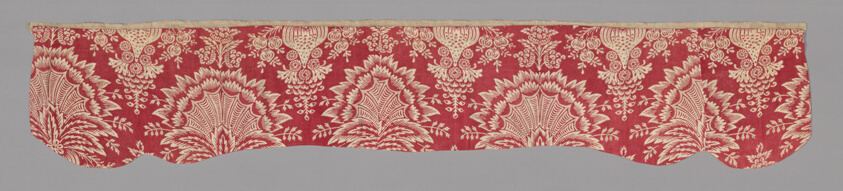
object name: Textile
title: Panel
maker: France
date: c. 1830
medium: Cotton, plain weave; block printed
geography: France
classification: textile; weaving - printed; printed textile